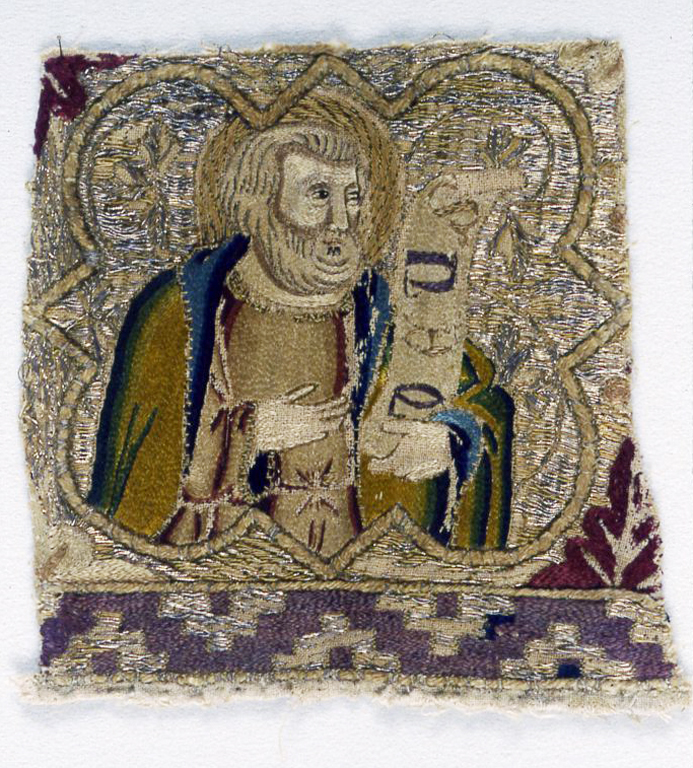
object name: Religious/Ritual Object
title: Fragment from an Orphrey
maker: Italy, Florence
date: 1360s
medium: Linen, plain weave; underlaid with linen, plain weave; embroidered with silk, gilt- and silvered-metal-strip-wrapped silk in split and surface satin stitches; laid work, couching, and padded couching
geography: Florence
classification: textile; needlework (visual works); liturgical; ritual objects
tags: religious scenes